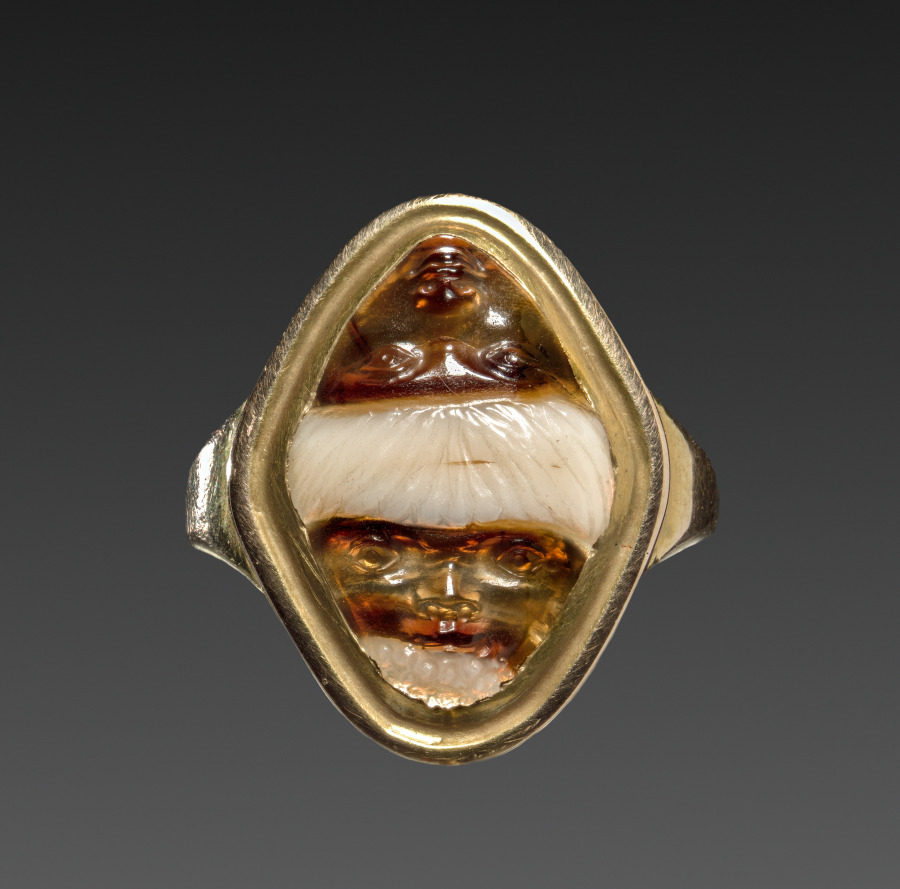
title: Ring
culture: European, 19th century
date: 1800s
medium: metal and hardstone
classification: Jewelry